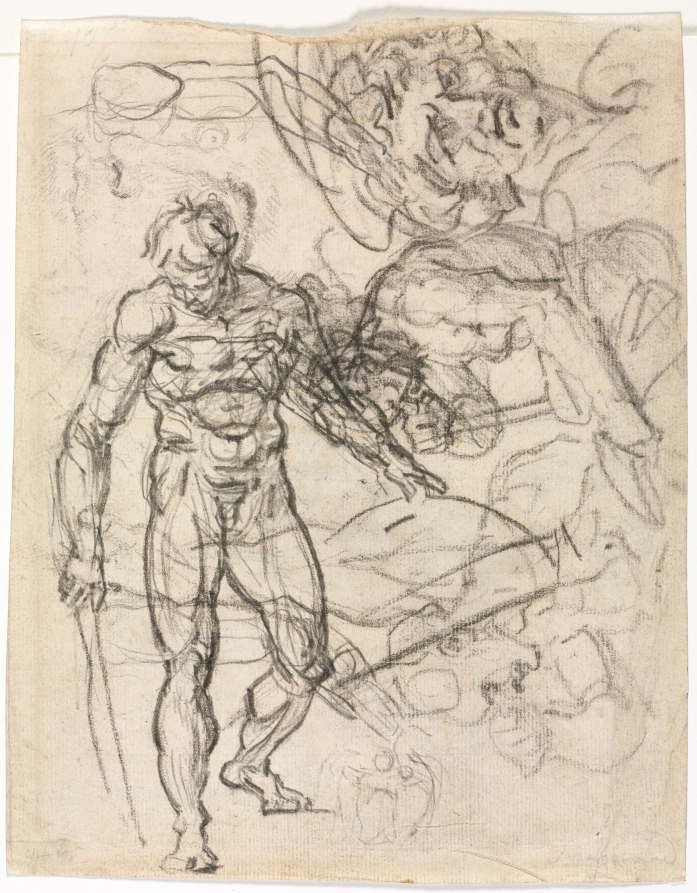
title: Figure Studies (verso)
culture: France, 18th century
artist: Jean-Honoré Fragonard (French, 1732–1806)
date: c. 1761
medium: black chalk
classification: Drawing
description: Quick drawings could serve a variety of purposes, and it is not always clear today why an artist created a particular sketch. This one may record a painting Fragonard saw during a journey to Italy, or capture an idea he was considering for a painting of his own. Orpheus, identified by the lute, grasps for his love Eurydice as she is pulled down into Hades. The snarling animals near his feet may represent Cerberus, the multiheaded guard dog of the underworld.